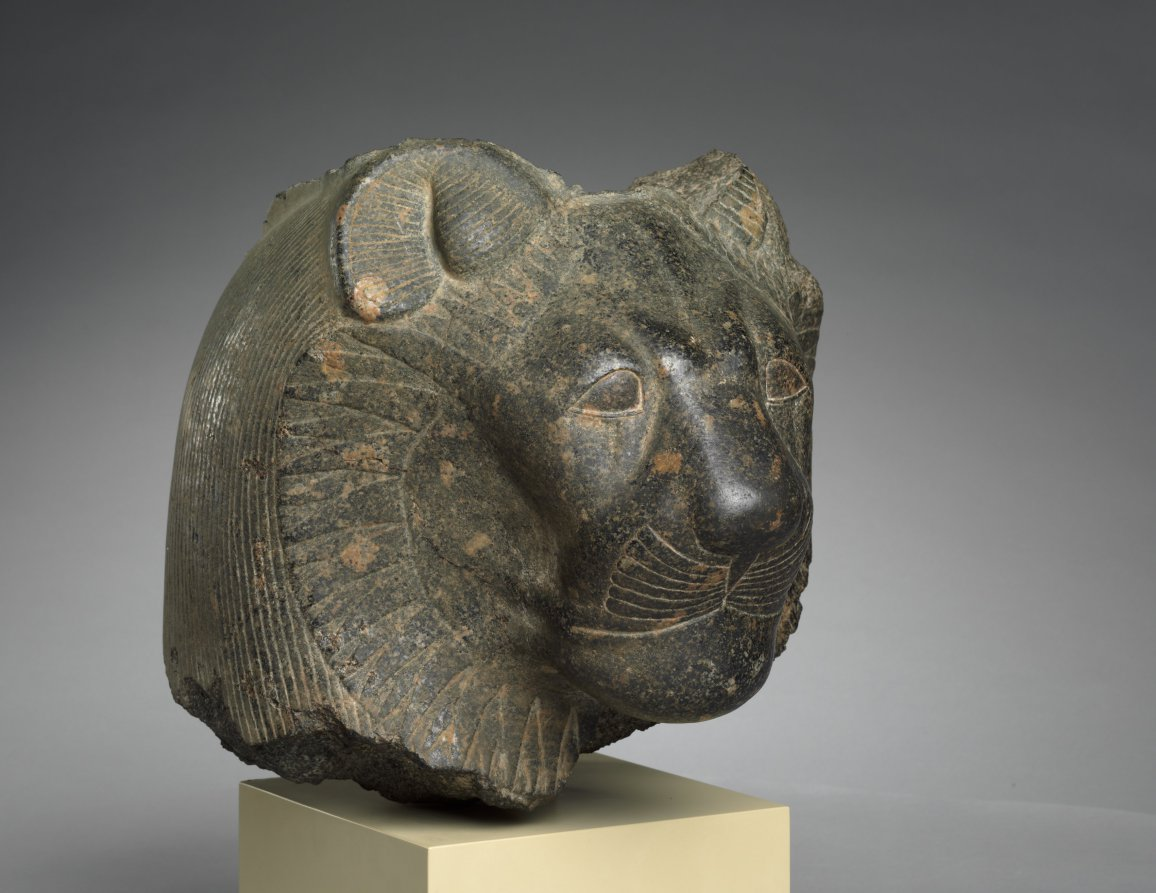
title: Head of Sekhmet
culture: Egypt, Thebes(?), New Kingdom (1540–1069 BCE), Dynasty 18, reign of Amenhotep III (1390–1352 BCE)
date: c. 1391–1353 BCE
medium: granodiorite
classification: Sculpture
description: This lioness head once belonged to a grand statue of the goddess Sekhmet, "the powerful one," probably seated and wearing a tight dress. Possibly appealing to her healing aspect, Pharaoh Amenhotep III, often described as “beloved of Sekhmet,” commissioned and dedicated hundreds of large granodiorite Sekhmet sculptures in his Theban mortuary temple. Thus, this head likely comes from Thebes, perhaps later moved across the Nile—like many such sculptures—to the temple of Mut, a related deity, at Karnak. Behind her stylized ruff, Sekhmet wears a wig, once crowned with a sun disk and uraeus, the stylized cobra symbolizing royal or divine power.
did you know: Amenhotep III may have dedicated 730 statues of Sekhmet, two for each day of the year.